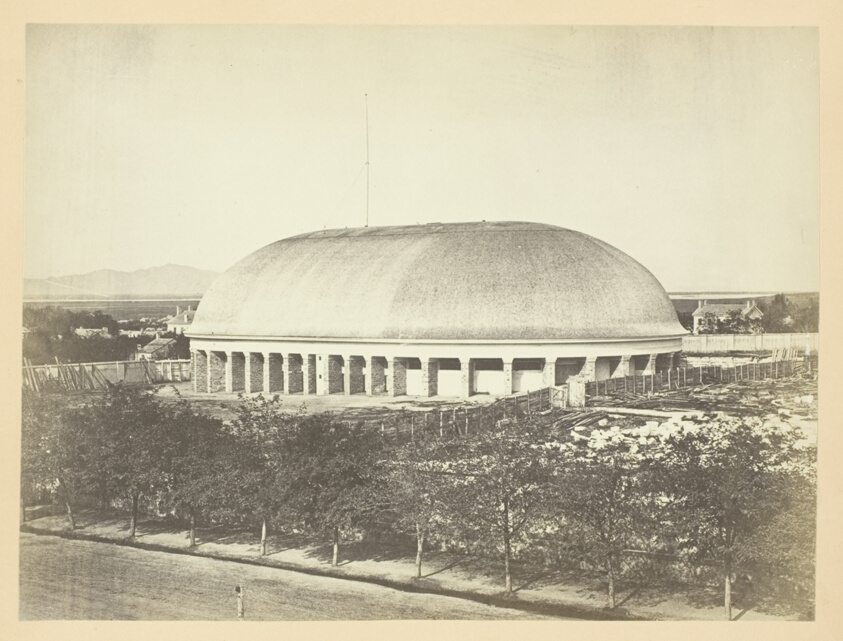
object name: Photograph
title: Great Mormon Tabernacle, Salt Lake City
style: 19th century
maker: Andrew J. Russell; American, 1830–1902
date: 1868/69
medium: Albumen print, pl. XXVII from the album "Sun Pictures of Rocky Mountain Scenery" (1870)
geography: United States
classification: photograph; albumen silver print; photography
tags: Collected by Hugh Edwards